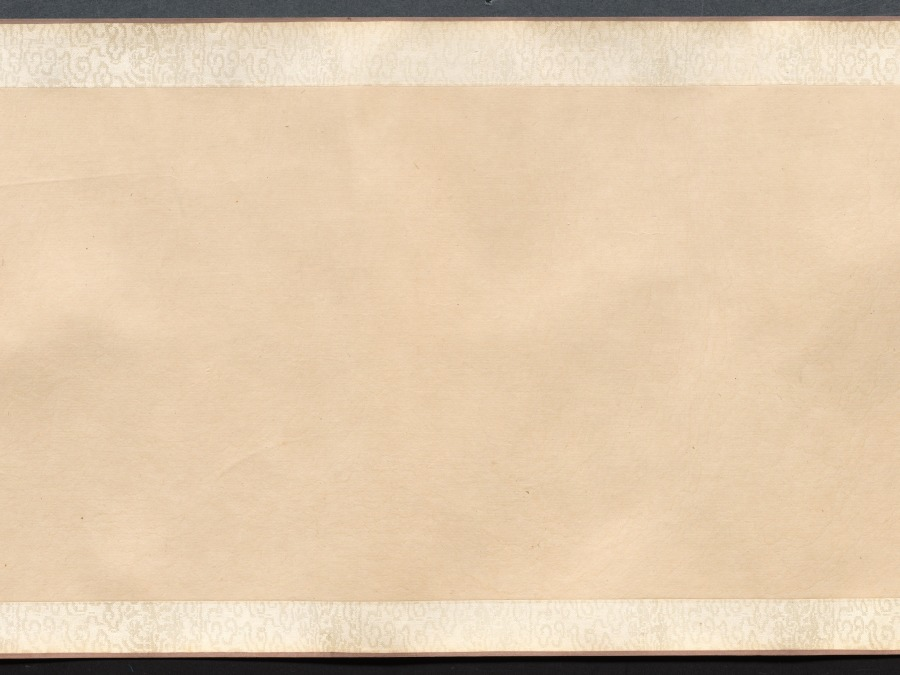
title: Four Poems: Calligraphy in Cursive Script (xingshu)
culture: China, Ming dynasty (1368–1644)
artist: Chen Jiru (Chinese, 1558–1639)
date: 1500s-1600s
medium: handscroll; ink on gold speckled paper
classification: Calligraphy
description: Written in graceful calligraphy with well-composed characters, the artist communicates his thoughts and state of mind in four poems. Characters written in dark, thick strokes convey rhythm, and indicate the moment after the writer had paused to recharge his brush with ink. Chen Jiru was a native of Huating (modern Shanghai). His calligraphy style resembles that of his friend, influential calligrapher Dong Qichang (1555–1636). Unlike Dong, Chen did not pursue government service: he burned his Confucian robes, declined a summons to serve at court, and immersed himself in literature, calligraphy, and painting.